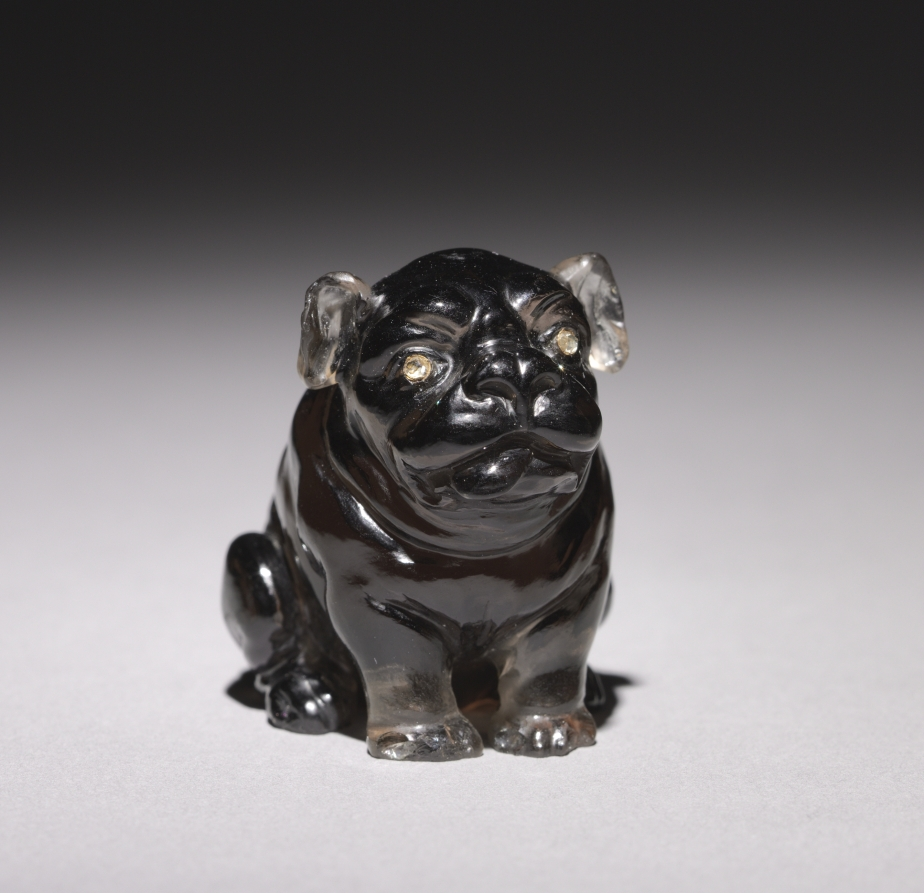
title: Bulldog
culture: Russia, St. Petersburg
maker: House of Fabergé (Russian, 1842–1918)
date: c. 1895–1915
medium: amethystine quartz, diamonds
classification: Miscellaneous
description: In creating luxurious accessories for a desk or tabletop, the House of Fabergé often used native hardstones such as multicolored agate and jasper, green nephrite, pink rhodonite, quartz, and rock crystal found in the Ural Mountains of western Russia. By paying careful attention to the unique colors and textures of the stones, Fabergé and his craftsmen brought them to life, turning smoky quartz into this figure of a seated bulldog, for example. The use of native materials also promoted Russian nationalism, which appealed greatly to the tsar and his family.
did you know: Fabergé's lapidaries carefully chose the stones to resemble the color and texture of the figure they were sculpting. The smoky quartz used for this bulldog was polished to resemble his dark shiny coat.